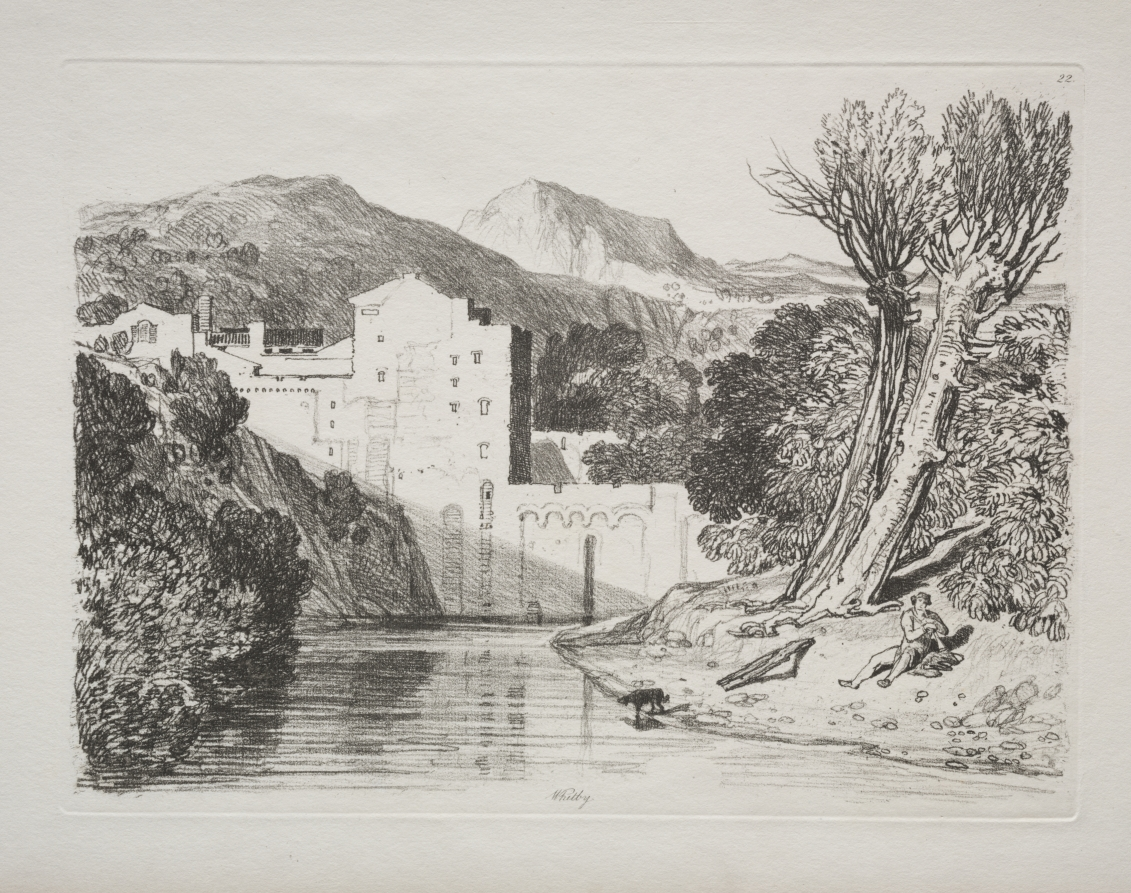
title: Whitby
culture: England, 19th century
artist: John Sell Cotman (British, 1782–1842)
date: c. 1824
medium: etching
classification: Print